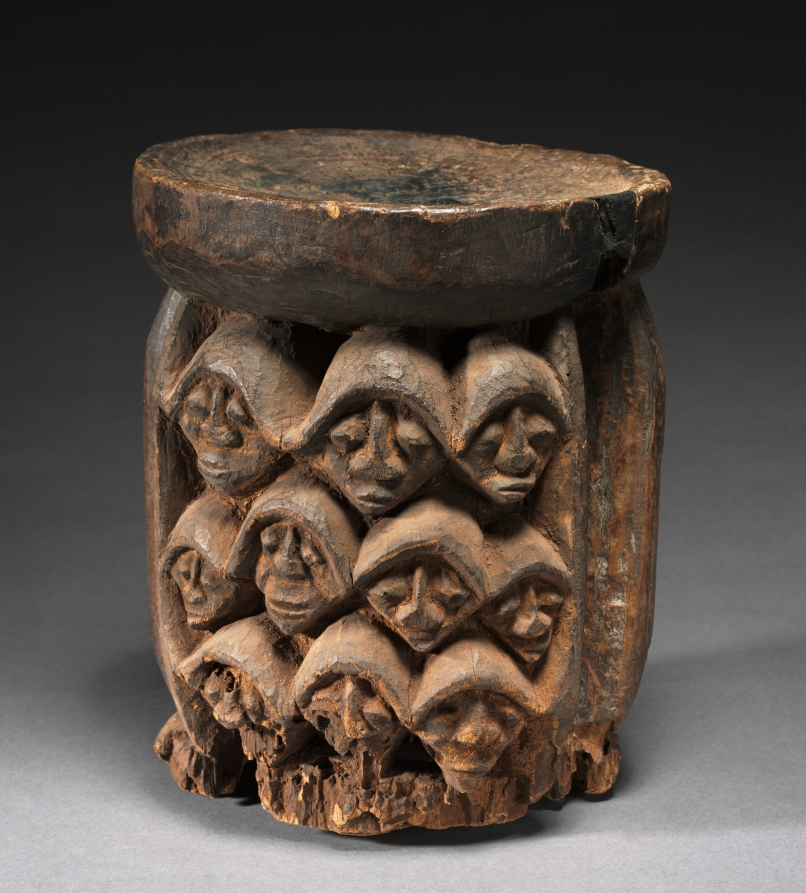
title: Stool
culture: Africa, Central Africa, Cameroon, unknown maker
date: c. 1910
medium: Wood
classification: Furniture and woodwork